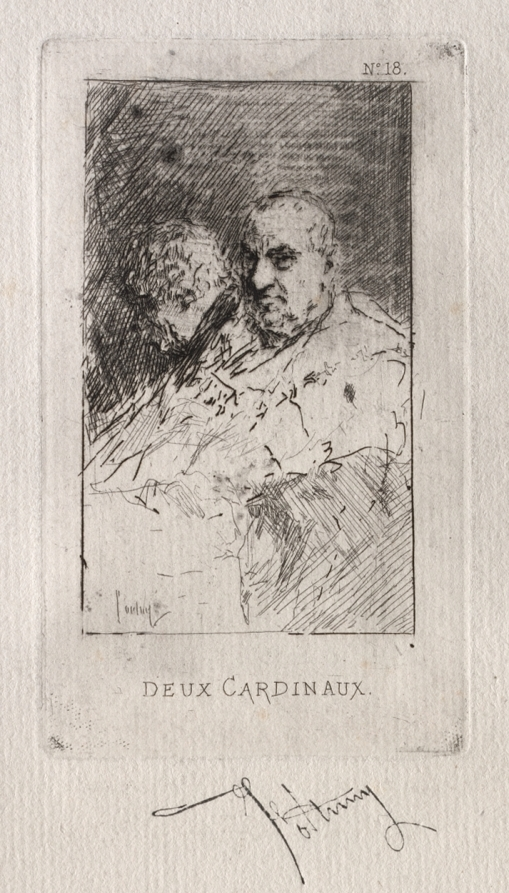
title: Two Cardinals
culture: Spain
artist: Mariano Fortuny (Spanish, 1838–1874)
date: c. 1860–70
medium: etching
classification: Print